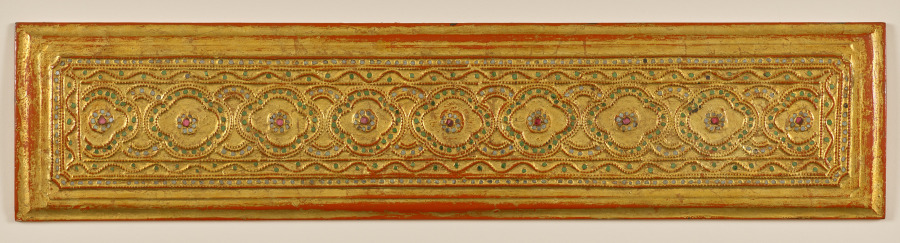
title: Top cover from a Kammavacha: Buddhist Ordination Text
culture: Myanmar (Burma)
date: 1800s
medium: Cover: lacquer, gilding, and glass appliqué on wood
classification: Manuscript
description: In premodern Burma, lay people commissioned lavishly ornamented manuscripts for ceremonial occasions, when officiants would read aloud from the text. Written in black lacquer, the text is in the language of Pali written in a Burmese script. It contains ordination rites and procedures for monastic ceremonies. The second to last page is covered with intricately drawn, winged celestial beings (nats) in gestures of praise. They fly amid intertwining vegetation—denoting bounty—that grows from serpentine forms that refer to rain clouds. Lionlike forms inhabit the space with them. The top and bottom covers are equally ornamented with jeweled floral patterning.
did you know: The Pali text of this manuscript is written in Burmese square script, which is also known as "tamarind seed script."